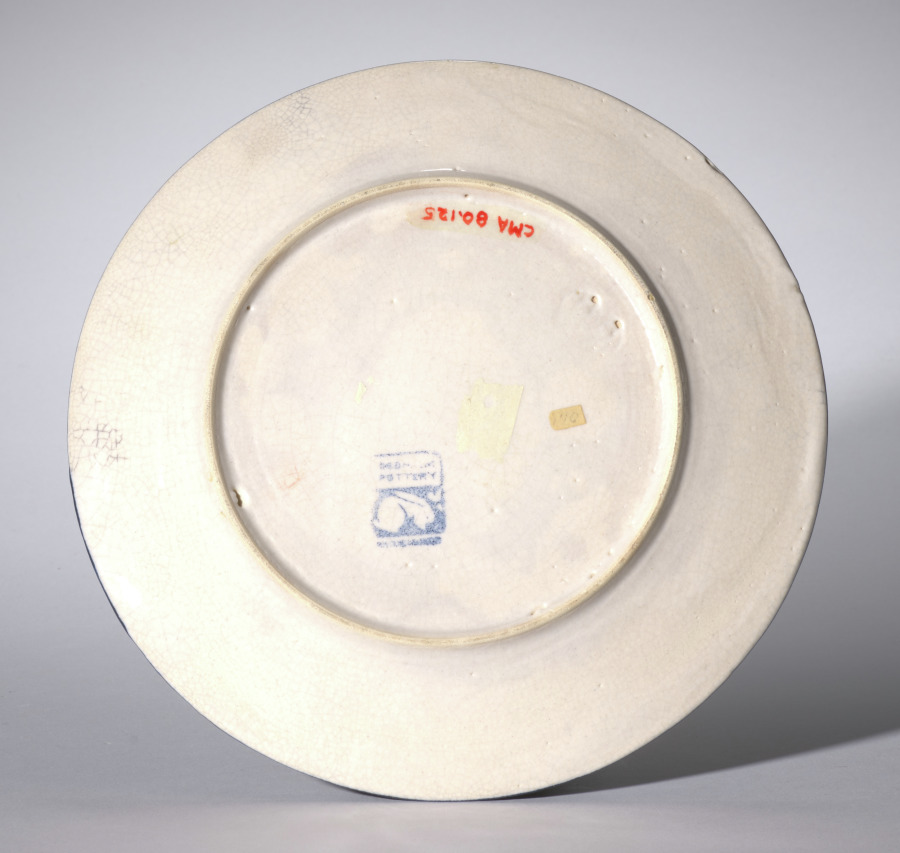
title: Small Plate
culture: America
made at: Dedham Pottery (American)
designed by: Joseph Lindon Smith (American, 1863–1950)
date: early 1900s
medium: earthenware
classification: Ceramic